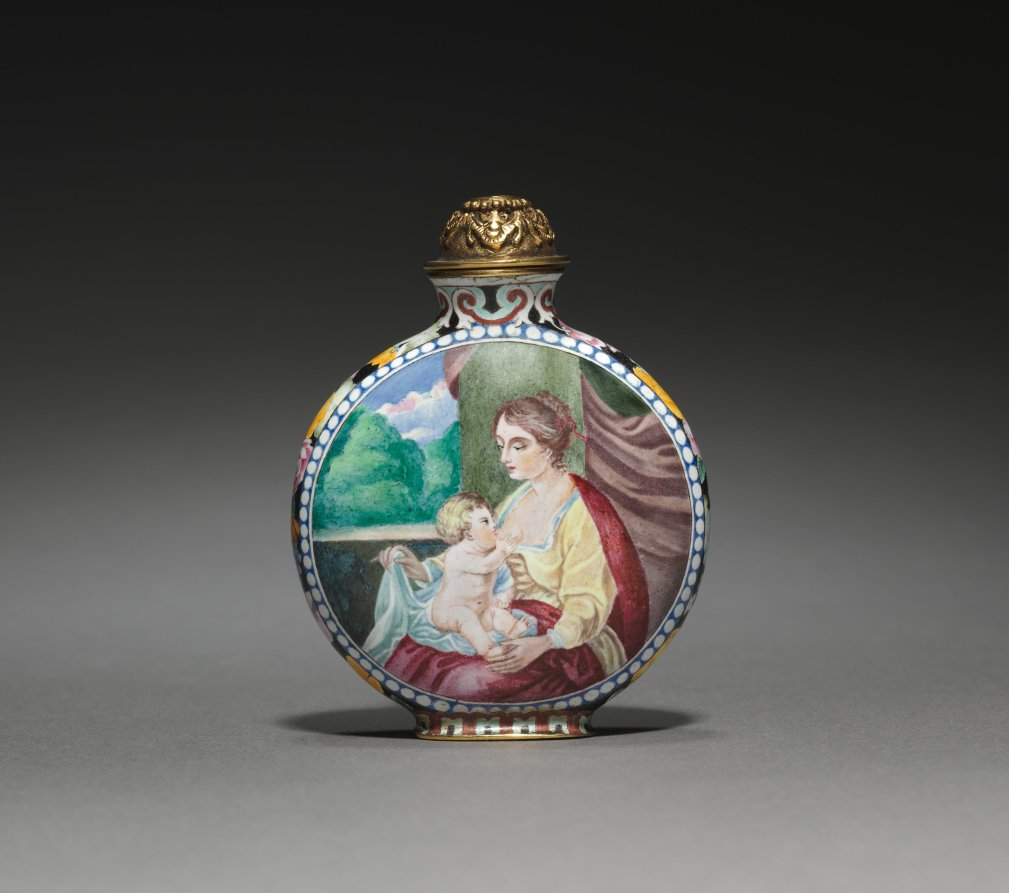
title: Snuff Bottle with European Figures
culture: China, Qing dynasty (1644-1911), Qianlong mark and reign (1736-95)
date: 1736–95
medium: painted enamel on copper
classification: Enamel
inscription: 乾隆年製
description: Snuff bottles were introduced from Europe to China around the 1700s to hold portable snuff or medicine.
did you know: The stopper is decorated with bats, which traditionally symbolize good luck, since both words (蝠 and 福) are both pronounced as fu in Chinese.